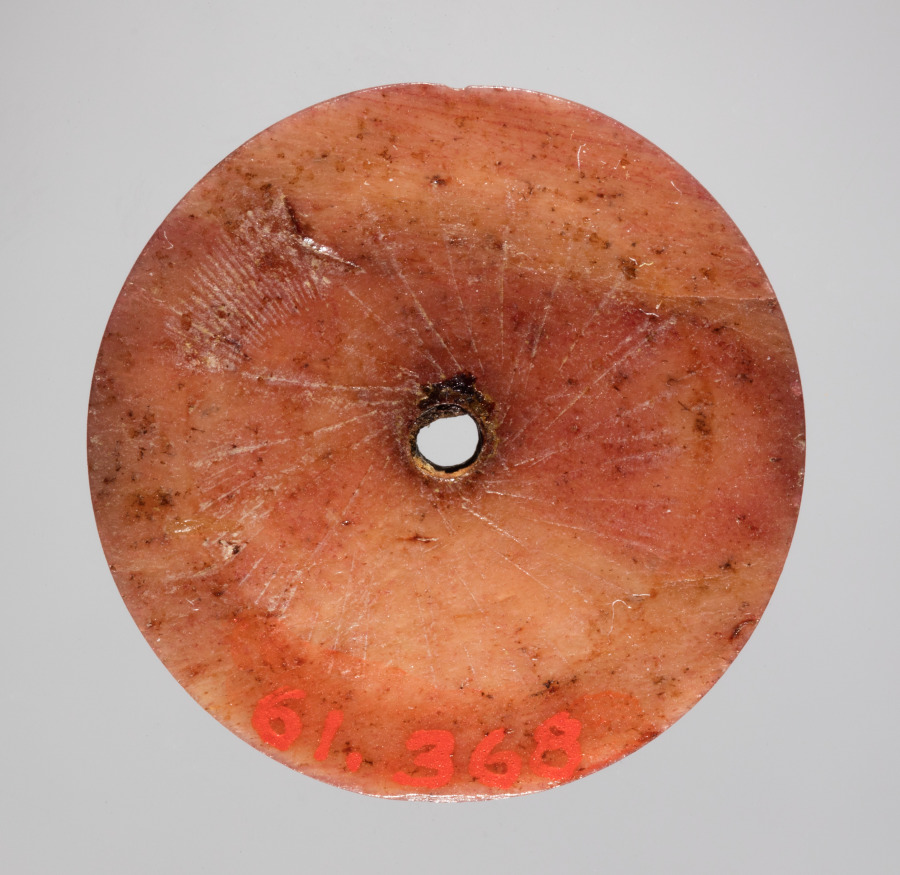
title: Spindle Whorl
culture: Iran, early Islamic period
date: 700s - 900s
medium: bone, incised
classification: Spindle Whorl